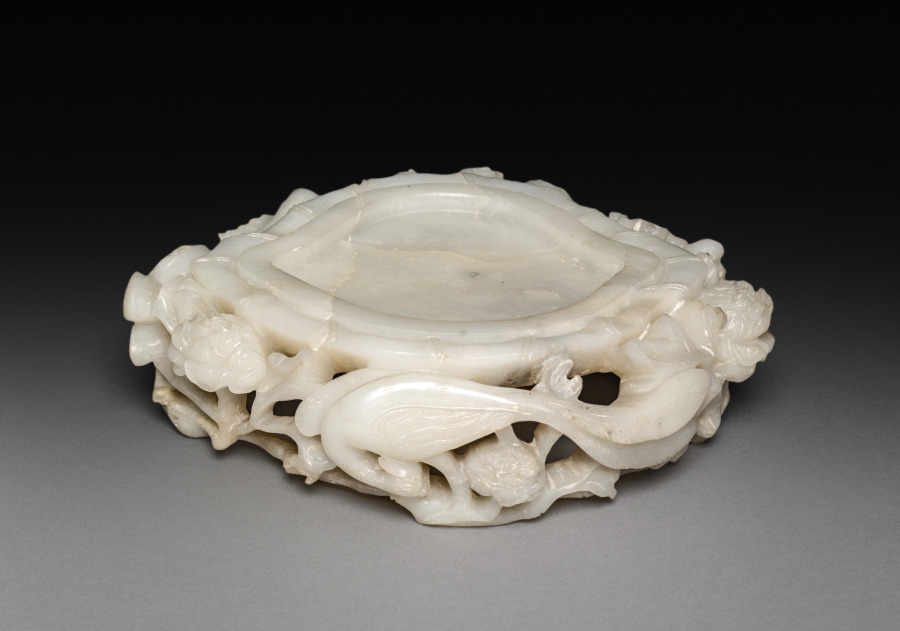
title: Three-Sectional Altar Group: Koro (upper section of base)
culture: China, Qing dynasty (1644-1911)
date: 1644–1911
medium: jade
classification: Jade